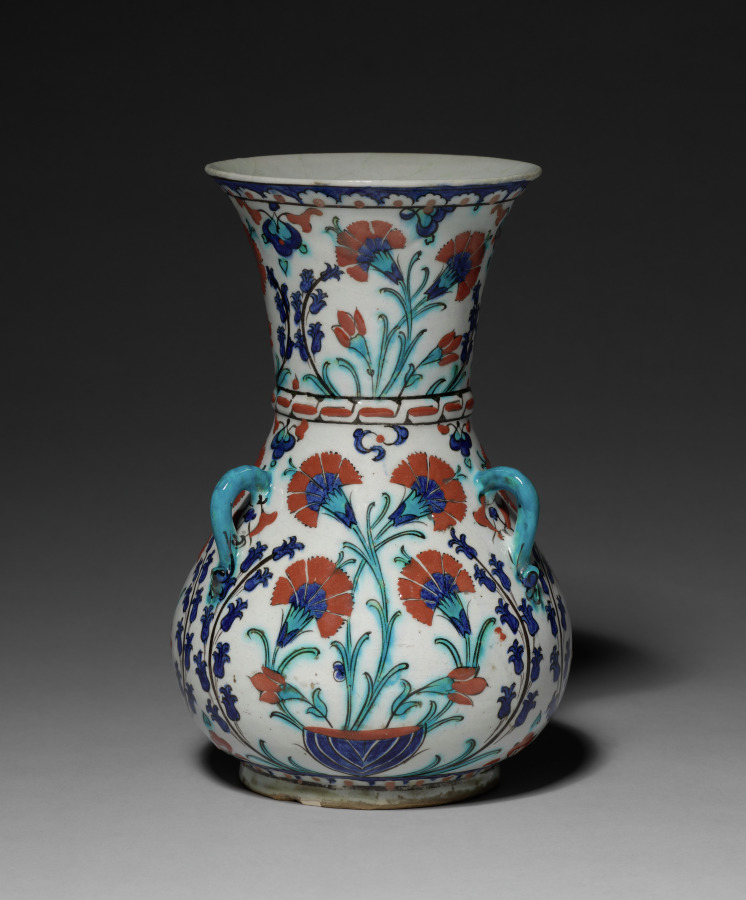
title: Mosque Lamp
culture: Turkey, Iznik, Ottoman period (1299–1922)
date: 1585–95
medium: Fritware with underglaze design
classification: Ceramic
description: Mosque lamps typically functioned as a lampshade, containing an oil lamp inside. Due to the opacity of this Ottoman lamp, it is likely that its primary function was not illumination. Instead, it would have been hung from chains in a mosque or mausoleum to add to the beauty of the space. This lamp is decorated with bright red carnations and blue hyacinths with additional floral and vegetal elements. The turquoise loops would have served for suspension from the ceiling. It is also possible that lamps like this were used as acoustic devices, softening the echo of prayer and discussion within the mosque’s halls.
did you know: Fritware is made of ground quartz, glass frit (partially fused glass), and a small proportion of fine white clay to approximate the light color and weight of Chinese porcelain.